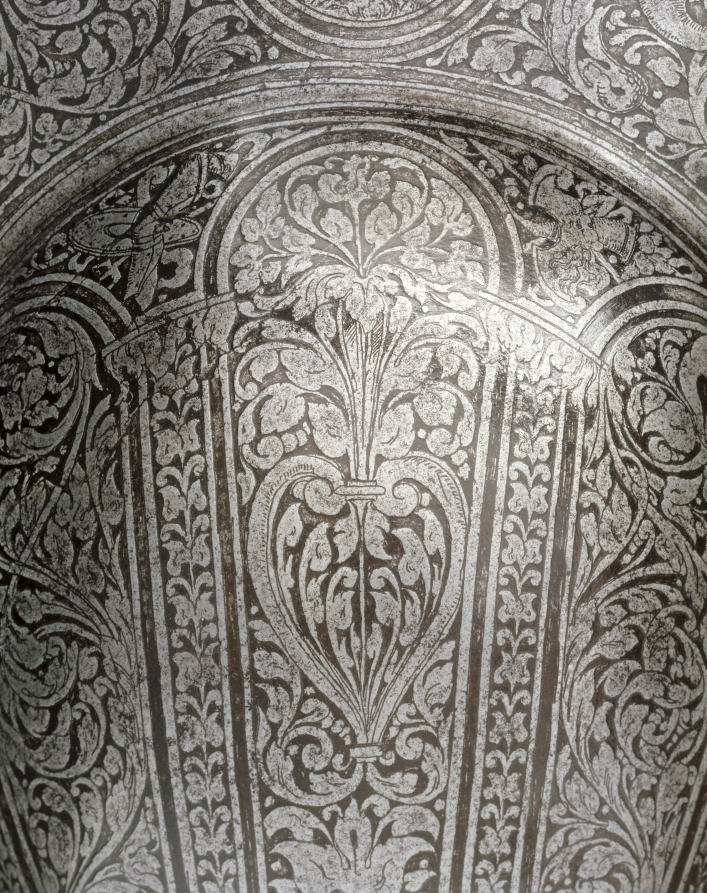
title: Morion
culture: North Italy, late 16th Century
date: c. 1575–1600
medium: steel with etched floral motif and medallion (on comb) with boar under oak tree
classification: Arms and Armor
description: The morion, an open helmet characterized by a tall comb and curved brim peaking before and after, was popularly associated with the Spanish conquistadors in the New World. In fact, morions were worn by infantry and light horsemen throughout Europe. They were also commonly worn by palace guards and thus often were decorated. This example has been beautifully etched over its entire surface. Armor this exquisitely decorated would not have been worn in battle, but used by palace guards for ceremonies and display.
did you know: Amongst the swirling floral patterns on this helmet, there is scene of a boar under a tree in the center medallion of the comb that tops the helmet.